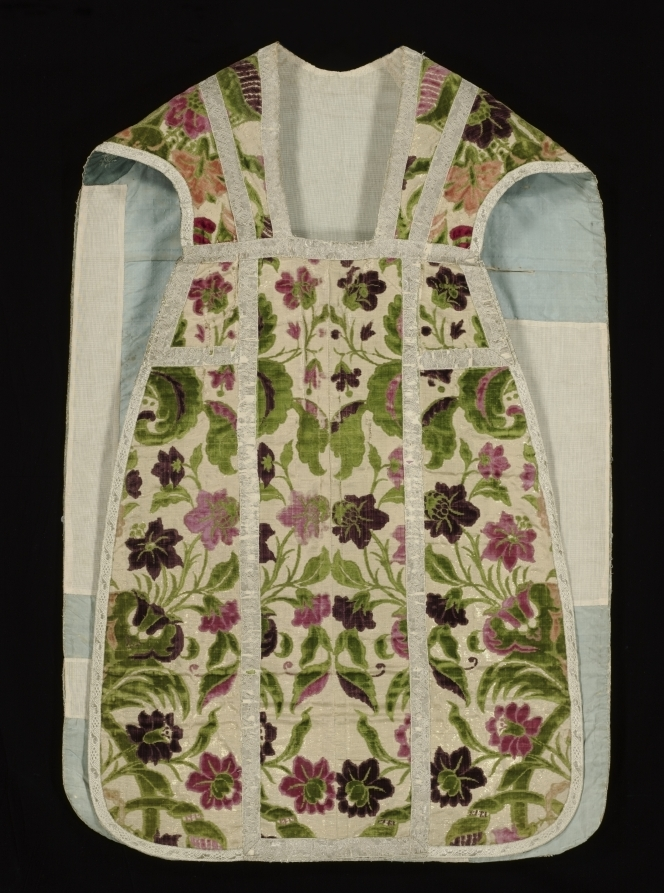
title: Chasuble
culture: Italy, Genoa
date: c 1600–1700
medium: Silk and gilt metal threads, woven; cut and uncut velvet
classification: Velvet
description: This sumptuous polychrome velvet displays a central vase with abundant flora and exotic leaves flanking curving blossoming fronds on a gilt-metal thread ground. The pattern was created with five colors of cut and uncut (loops) velvet pile. Only the pile warps for the lush green velvet occur across the entire cloth, while each additional color appears in vertical stripes—crimson, peach, rose, and purple. These widely acclaimed velvets from Genoa were the most colorful woven in Europe. Both the long stole and the shorter maniple are insignia of the office of deacons, priests, and the higher clergy. The stole was worn under a chasuble according to the office and the maniple was hung on the left forearm. The burse is a stiff receptacle in which the folded corporal, a white linen cloth on which the sacred bread and chalice are placed during the Mass, is carried to and from the altar. The upper fabric matches the chasuble, the bottom is a plain silk, and the interior has an obligatory linen lining.